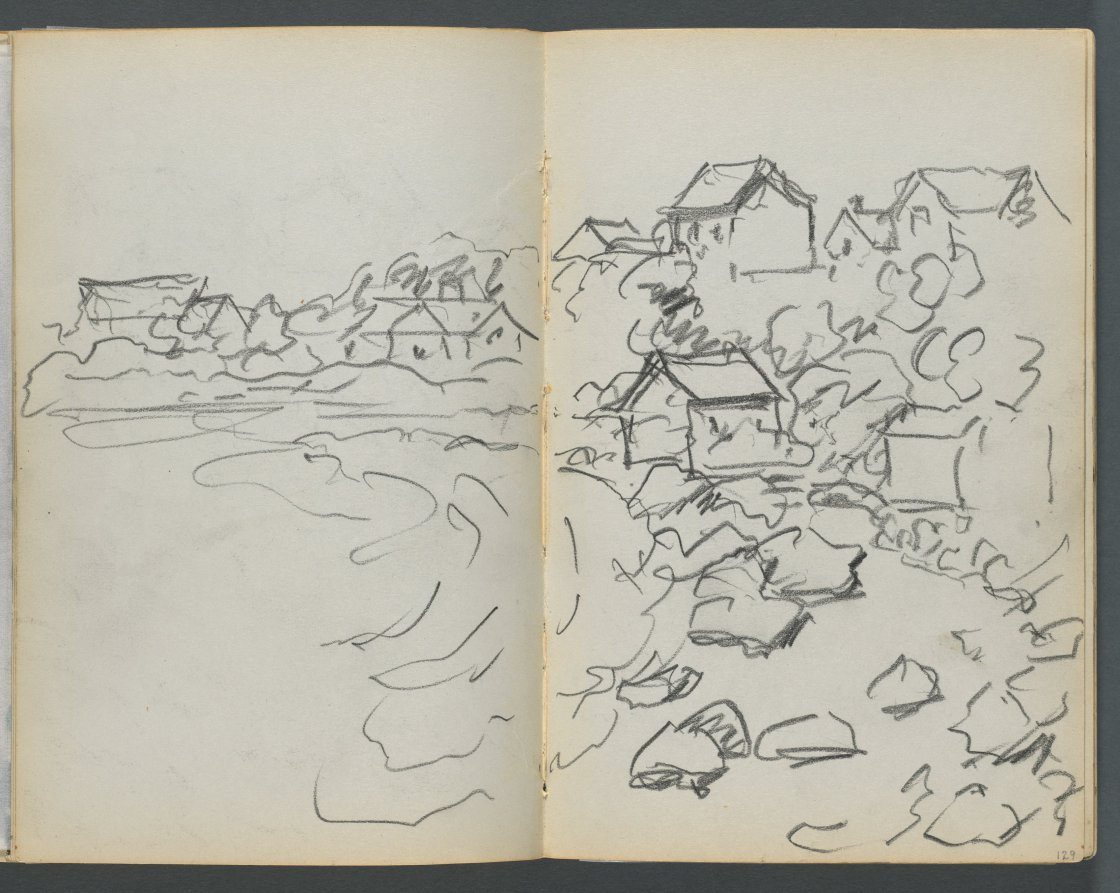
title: Sketchbook, The Dells, N° 127, page 128 & 129: Houses on a Coast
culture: America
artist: Maurice Prendergast (American, born Newfoundland [now Canada], 1858–1924)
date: c. 1919–1921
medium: graphite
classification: Bound Volume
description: This sketchbook contains 59 pages of graphite drawings and 16 watercolors made at various locations on Cape Ann, Massachusetts.